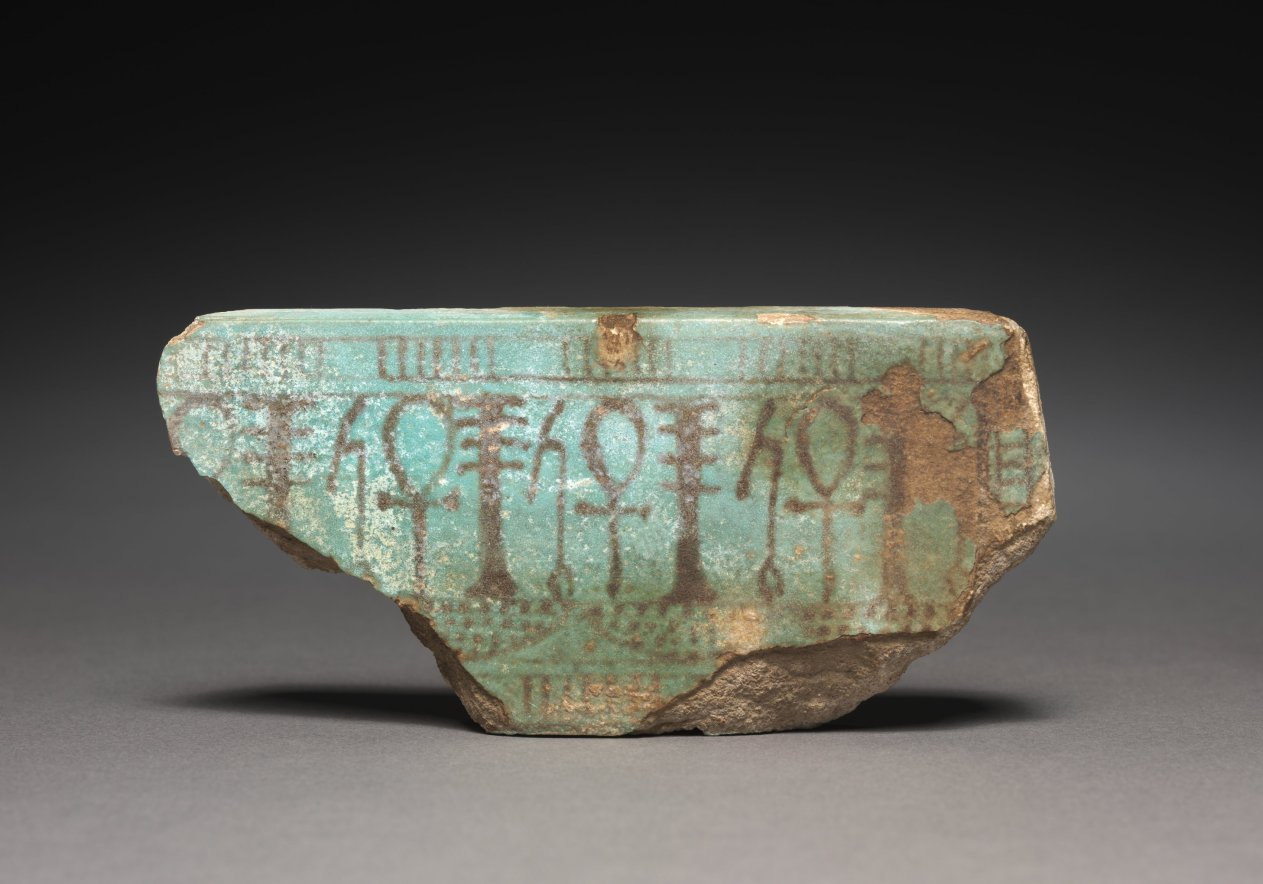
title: Fragment of Statue Base (?)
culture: Egypt, New Kingdom (1540–1069 BCE)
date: 1540–1069 BCE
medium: turquoise faience with purple-black painted decoration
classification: Sculpture